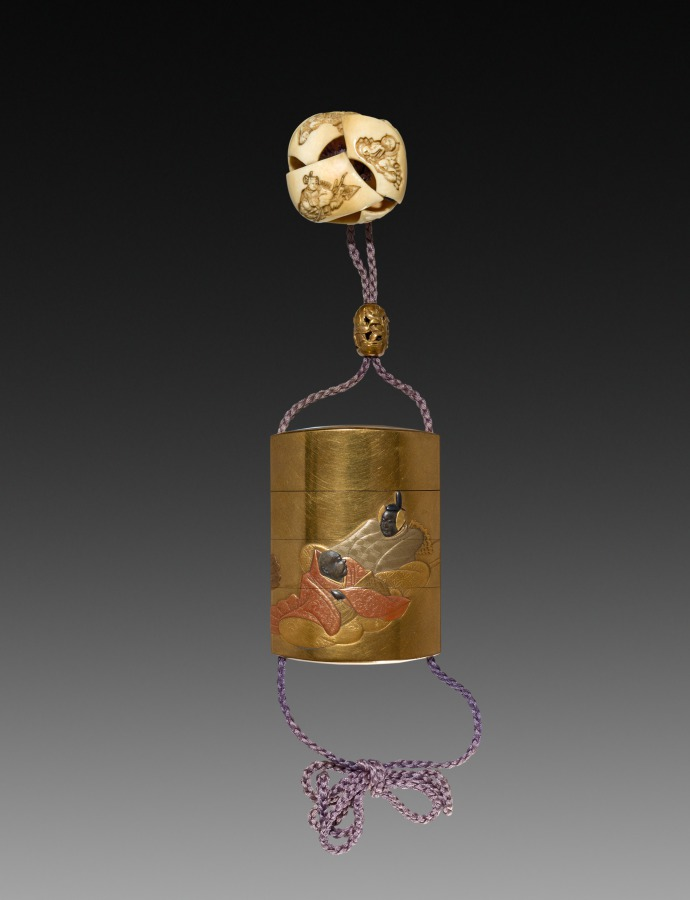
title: Inro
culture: Japan, Edo period (1615–1868)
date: early to mid-1800s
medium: lacquer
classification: Lacquer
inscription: Signature: Yutokusa